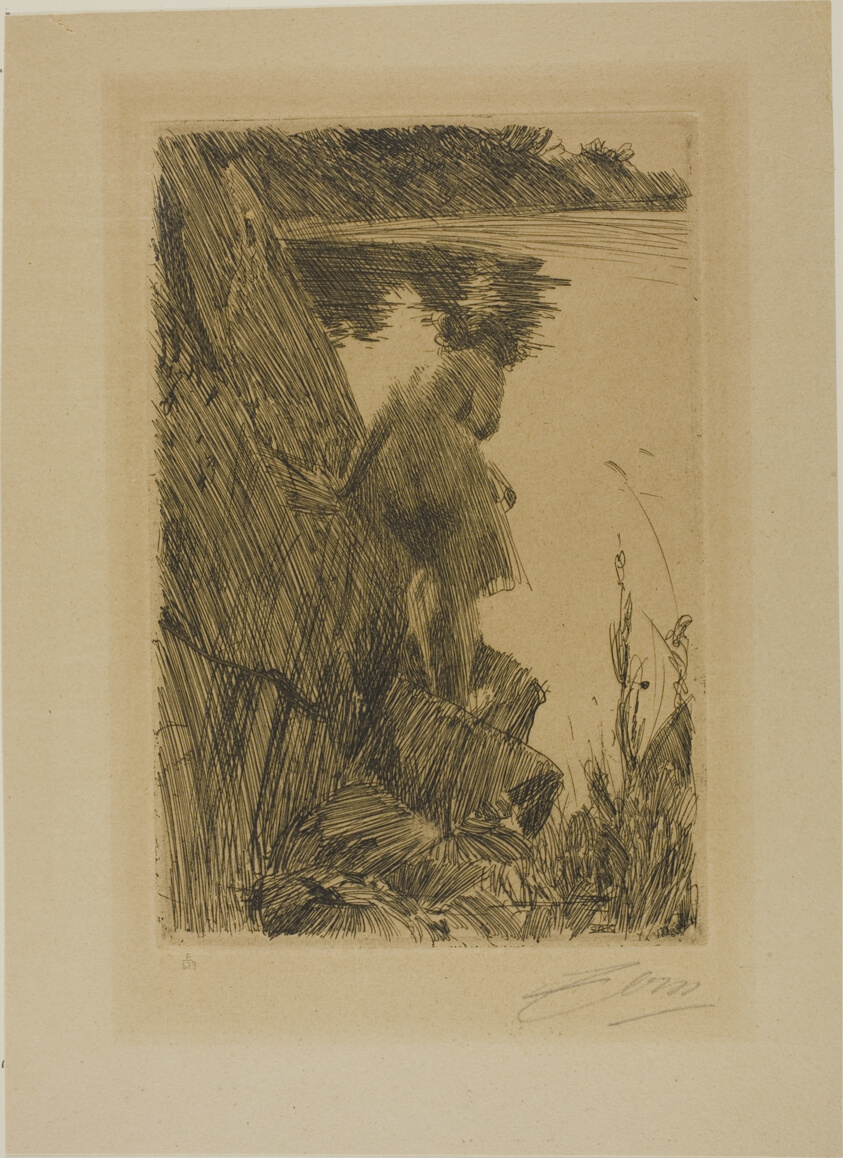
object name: Print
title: Bather (Evening) III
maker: Anders Zorn (Swedish, 1860-1920)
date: 1896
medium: Etching in black on tan wove paper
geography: Sweden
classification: etching; print; prints and drawing